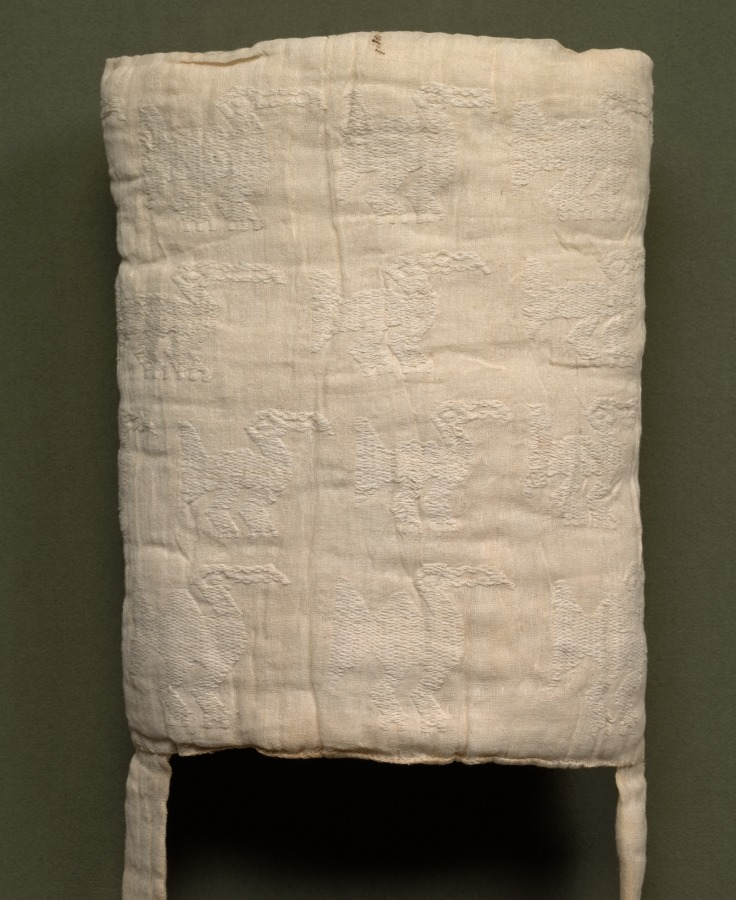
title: Padded Hat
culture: Peru, North Coast, Chimú style, 1200-1460s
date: 1460–1625 (radiocarbon date, 95.4% probability)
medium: cotton; plain weave, brocaded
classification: Garment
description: This garment may have been found with others in the collection that formed a matched set worn by a noble of the Chimú, who rose to power on Peru’s north coast after 1000 AD.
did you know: The Chimú forged an empire that thrived until the 1460s, when the Inka incorporated it into their own imperial domain.